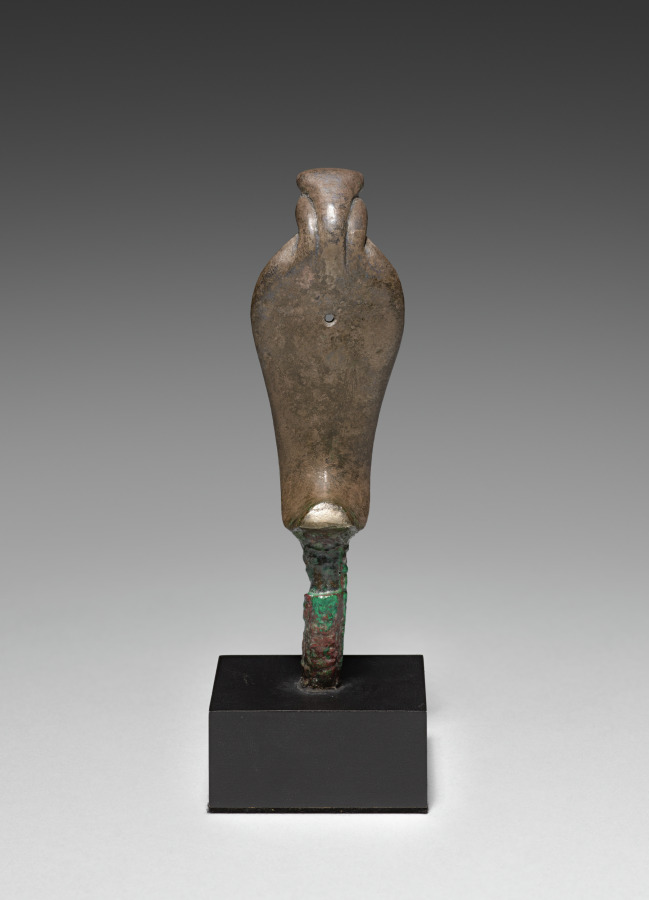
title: Uraeus (Rearing Cobra)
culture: Egypt, New Kingdom (1540–1069 BCE), Dynasty 19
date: 1307–1196 BCE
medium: Silver-copper alloy with inlays (copper, feldspar, turquoise, obsidian?) and gilding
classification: Metalwork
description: Made from a silver-copper alloy, this rearing cobra likely served as a uraeus, symbolizing royal or divine power in ancient Egypt. Its lowermost portion likely fit into the top of the head of a large sculpture, while its body and tail seem cut short, perhaps making room for a solar disk to rise up behind. The eyes are inlaid, and six cavities for additional inlay remain on the expanded hood, the lowermost still intact, the others likely once filled with brightly colored blue and red stone. Much of the remaining surface may once have been gilded, to judge from remaining traces of gold on the back.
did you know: The word uraeus comes from an Egyptian term for “rising/rearing up,” describing the cobra’s position.